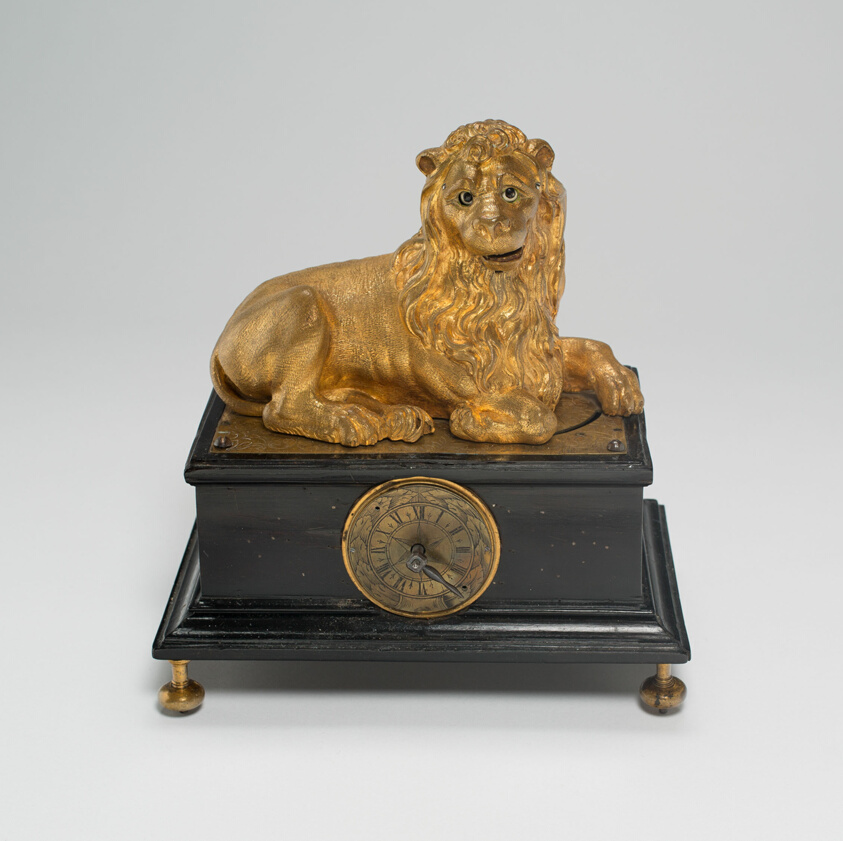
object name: Metalwork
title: Automaton Clock in the Shape of a Lion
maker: Augsburg, Germany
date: c. 1630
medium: Gilt bronze, ebony, and metal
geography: Germany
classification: clock; furniture; european decorative arts; metalwork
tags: furniture